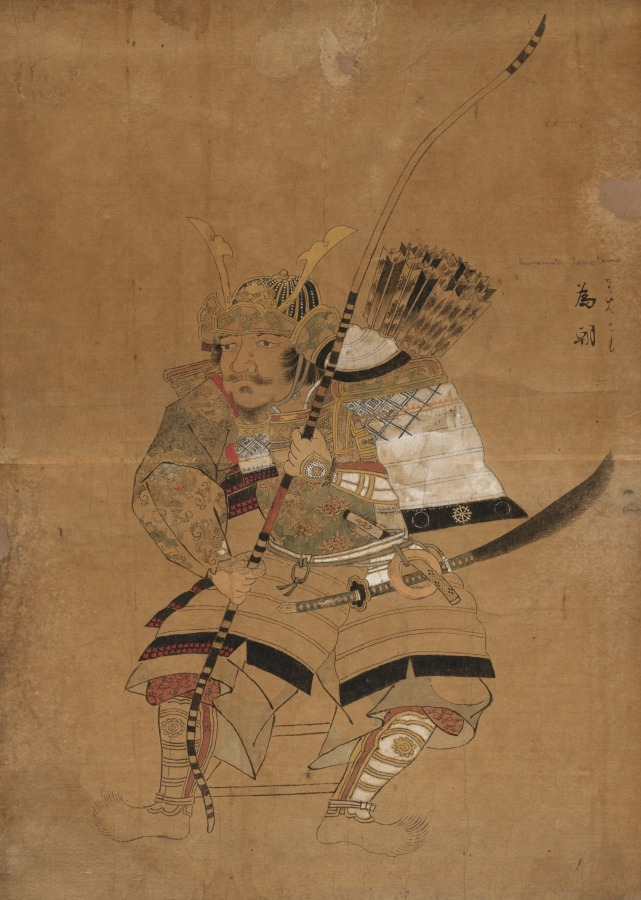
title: Sketch Model for Portraits of Minamoto Tametomo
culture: Japan, Edo period (1615–1868)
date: 1615–1868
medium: Ink and color on paper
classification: Painting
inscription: 為朝 ためとも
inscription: Minamoto Tametomo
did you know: This is a model for paintings. Notations on the figure's left shoulder instruct on color and pattern.